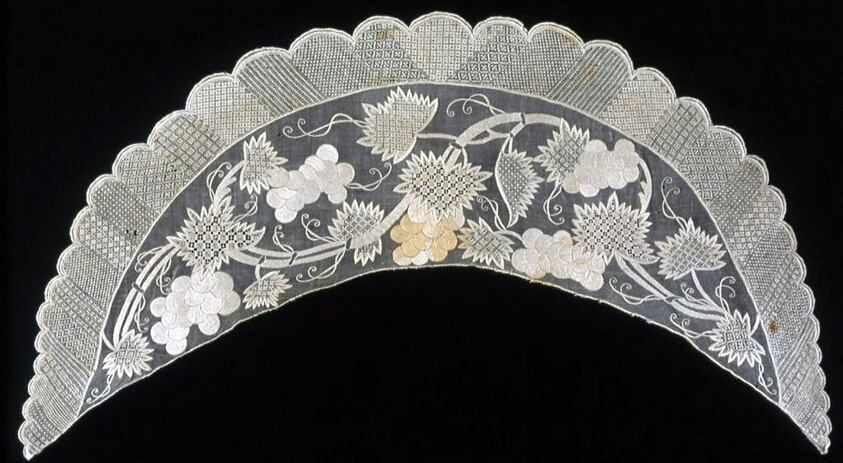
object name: Textile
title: Collar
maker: Philippines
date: 18th century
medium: Pineapple fiber, plain weave; cut and drawn work; embroidered with cotton yarns in interlocking lace and single faggot stitches; Roumanian couching and darned wheels; pulled threadwork embroidered in cross, Indian drawn filling, overcast, Roumanian and single faggot stitches; Roumanian couching; embroidered in buttonhole, double running, satin and stem stitches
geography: Philippines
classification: textile; needlework (visual works); costume accessory; costume